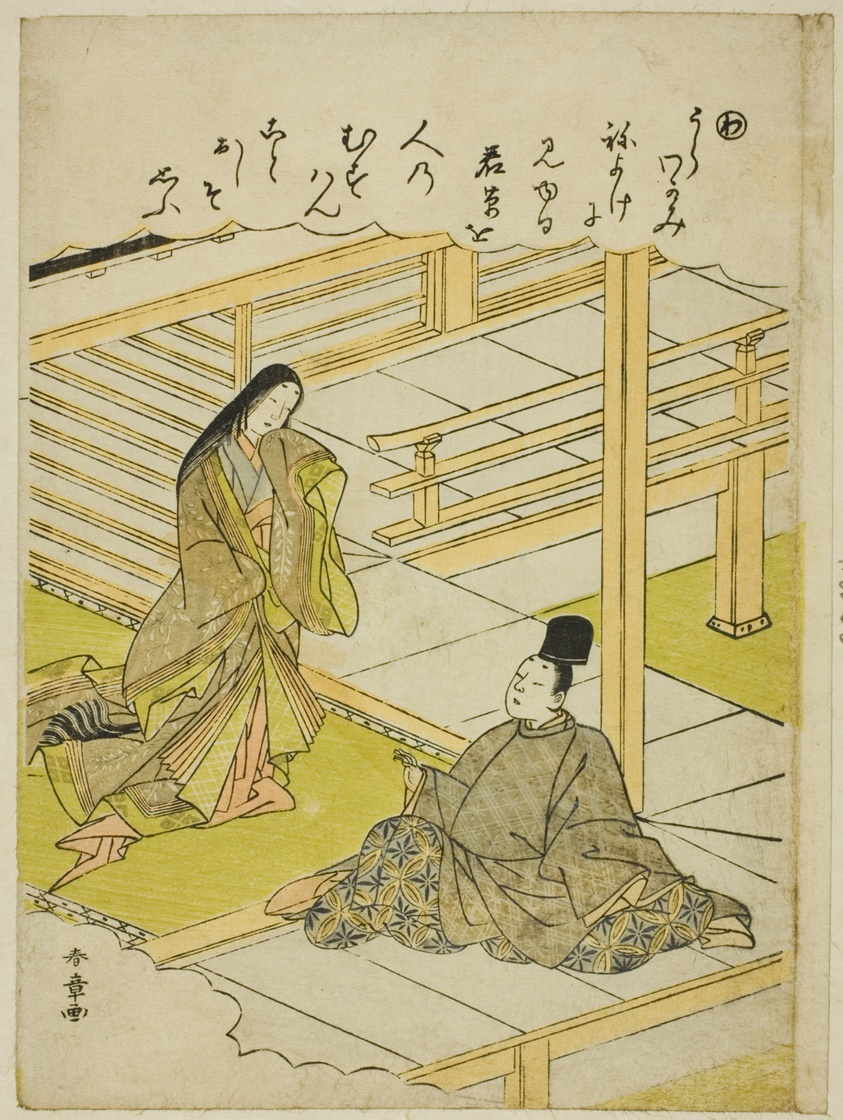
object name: Print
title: "Wa": Young Grass, from the series "Tales of Ise in Fashionable Brocade Pictures (Furyu nishiki-e Ise monogatari)"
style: Japanese (culture or style)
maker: Katsukawa Shunsho 勝川 春章; Japanese, 1726-1792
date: c. 1772/73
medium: Color woodblock print; koban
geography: Japan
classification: woodblock print; print; asian art